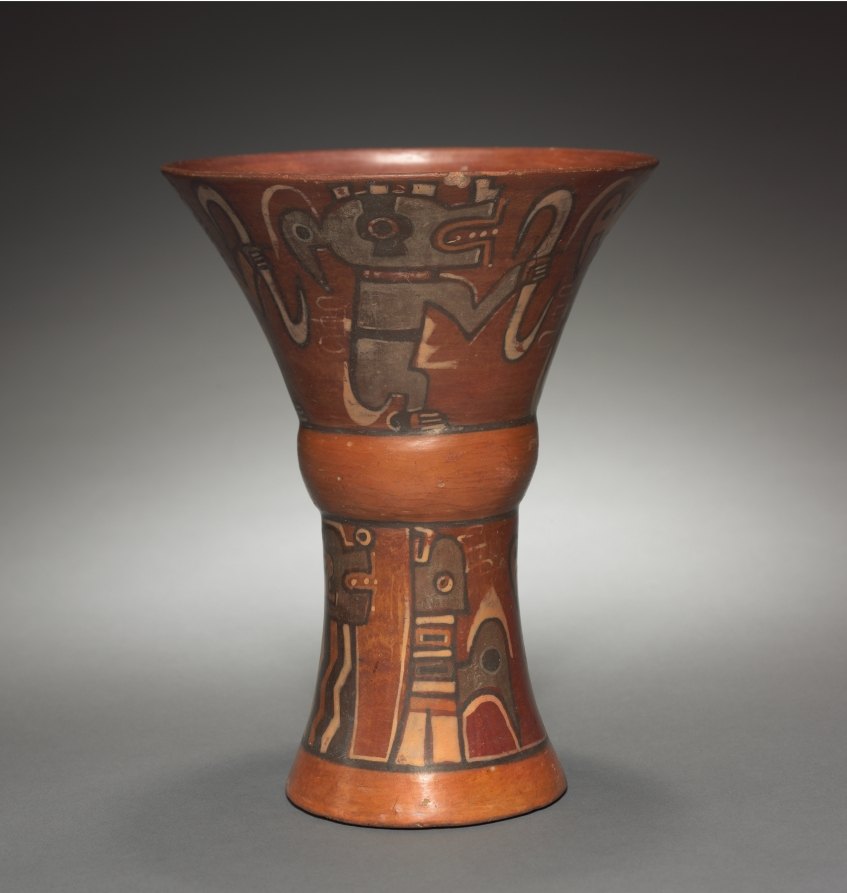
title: Kero (Waisted Cup)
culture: Bolivia, Cochabamba(?), Tiwanaku style, 400-1000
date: 400–1000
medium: earthenware with colored slips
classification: Ceramic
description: The kero is a distinctive Tiwanaku vessel form, imitated by the later Inka, who used the cups in political and religious ceremonies. It is assumed that the same was true at Tiwanaku, where impressive stone figures, perhaps rulers, hold keros as though they are emblems of authority. Perhaps, like the Inka, the Tiwanaku used keros to drink chicha, a corn beer shared to cement bonds of mutual obligation among allies.